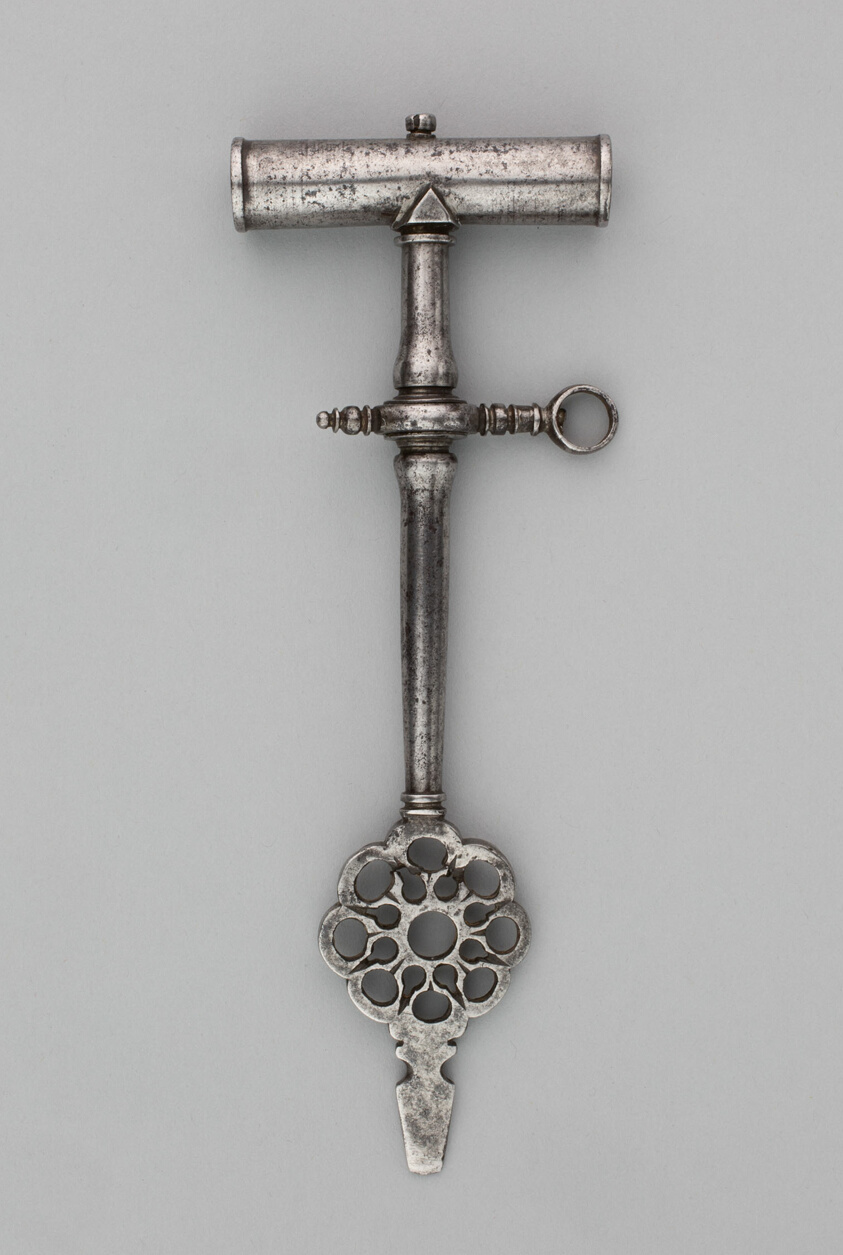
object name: Arms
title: Combined Wheel-Lock Spanner and Screwdriver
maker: German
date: 1570/1600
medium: Iron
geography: Germany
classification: firearm-accessory; arms; arms and armor